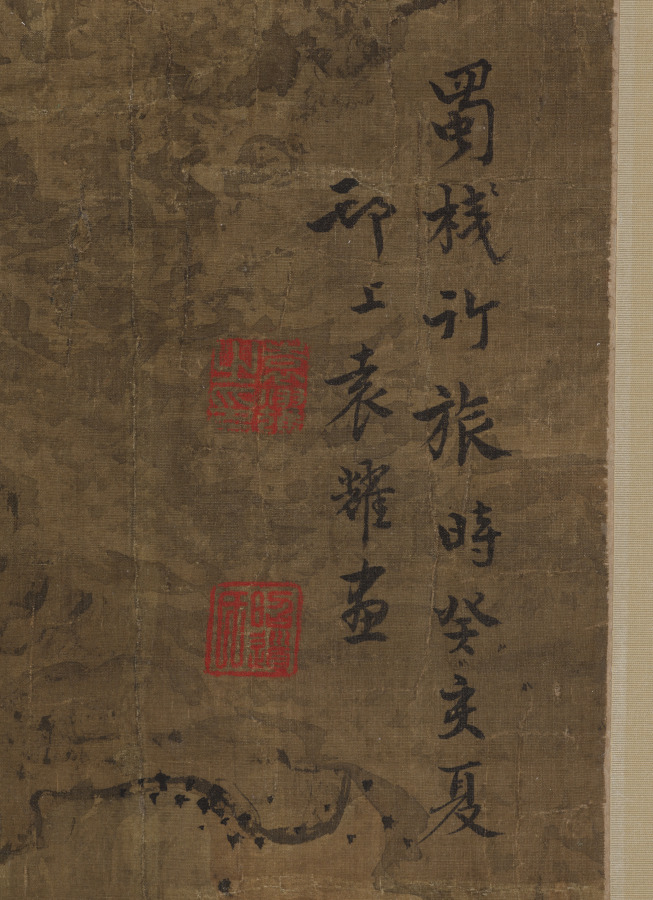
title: Road to Shu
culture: China, Qing dynasty (1644–1911), Qianlong reign (1736–95)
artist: Yuan Yao (Chinese, active mid-1700s)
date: 1743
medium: Hanging scroll; ink and color on silk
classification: Painting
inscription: artist's seals: yuan yao shi yin 袁耀 之印, zhao dao shi 昭道 氏 two collector’s seals: jin ju and illegible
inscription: Shu han xinglü //shi guihai xia //Hanshang Yuan Yao hua// 蜀椷行旅时癸亥夏- 邗上 袁耀 画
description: Few works by the Yuan workshops in Yangzhou present a continuous composition of such monumental scale as this hanging scroll. Road to Shu (in Sichuan province) depicts the trade of goods over long distances and through mountainous terrain. Busy travelers lead mules over footbridges, mountain paths wind along steep slopes, and soaring bridges connect peaks divided by deep gorges. The Yuan studios produced paintings to decorate the residences of wealthy Yangzhou salt merchants and princely palaces. The title Road to Shu refers to the historical drama of the flight of Tang emperor Xuanzong (reigned 712–56) to Sichuan in the aftermath of the An Lushan Rebellion (755–63). At the same time, the scenery alludes to Anhui, the mountainous native country of many of the salt merchants and their trade routes in northern parts of the empire.